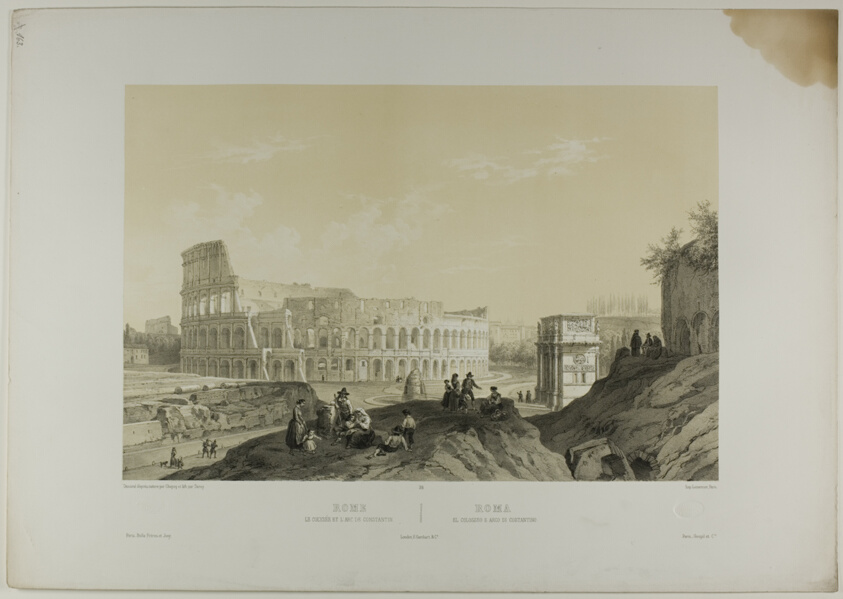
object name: Print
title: Rome: The Coliseum and the Arch of Constantine, plate 38 from Italie Monumentale et Pittoresque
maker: Nicolas Chapuy (French, 1790-1858); printed by Deroy (French, 19th century)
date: c. 1848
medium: Lithograph from two stones on white wove paper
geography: France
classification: lithograph; print; prints and drawing